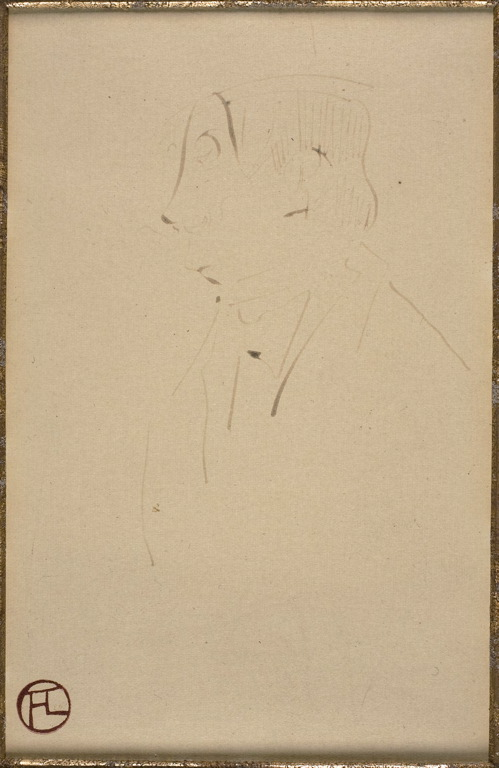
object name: Drawing and Watercolor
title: Head of a Man in Profile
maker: Henri de Toulouse-Lautrec (French, 1864-1901)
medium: Ink on ivory laid paper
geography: France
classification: pen and ink drawings; drawings (visual works); prints and drawing